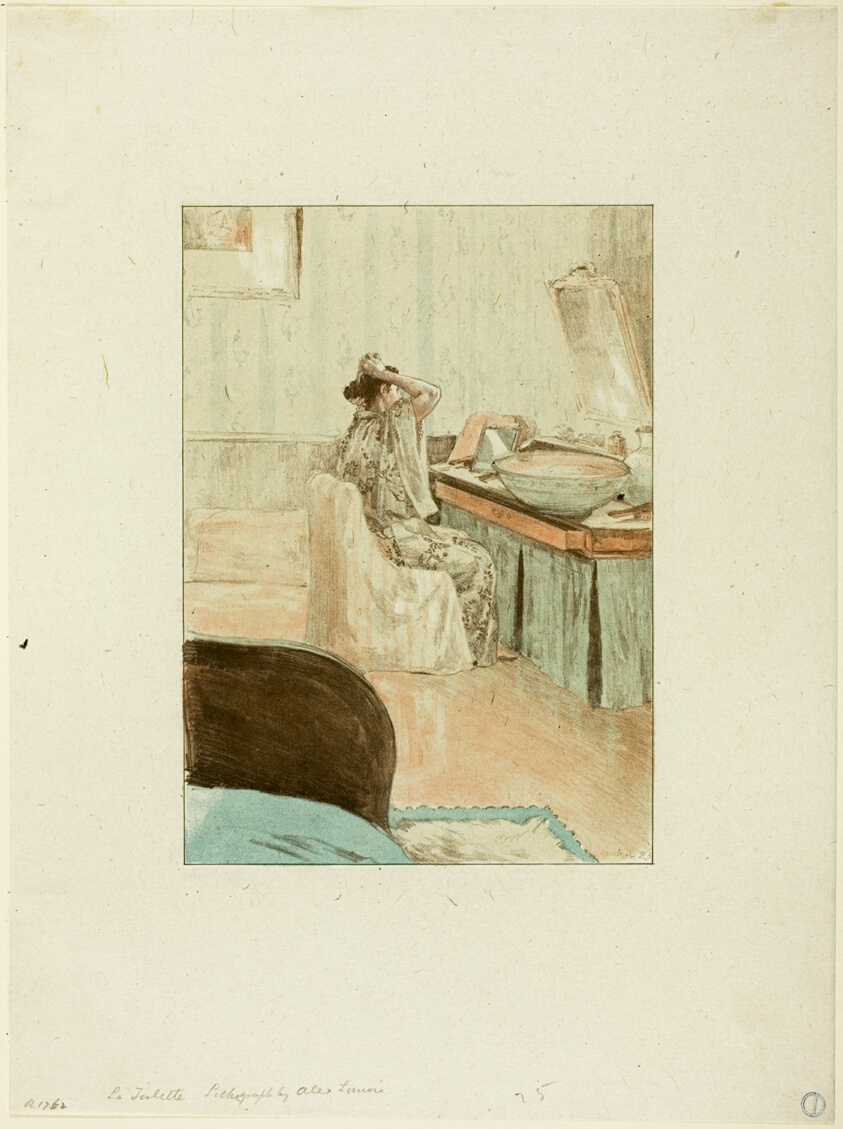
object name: Print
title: La Toilette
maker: Alexandre Lunois (French, 1863-1916)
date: 1892–93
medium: Lithograph in rose, pale green-blue and brown on grayish-ivory laid China paper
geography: France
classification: lithograph; print; prints and drawing